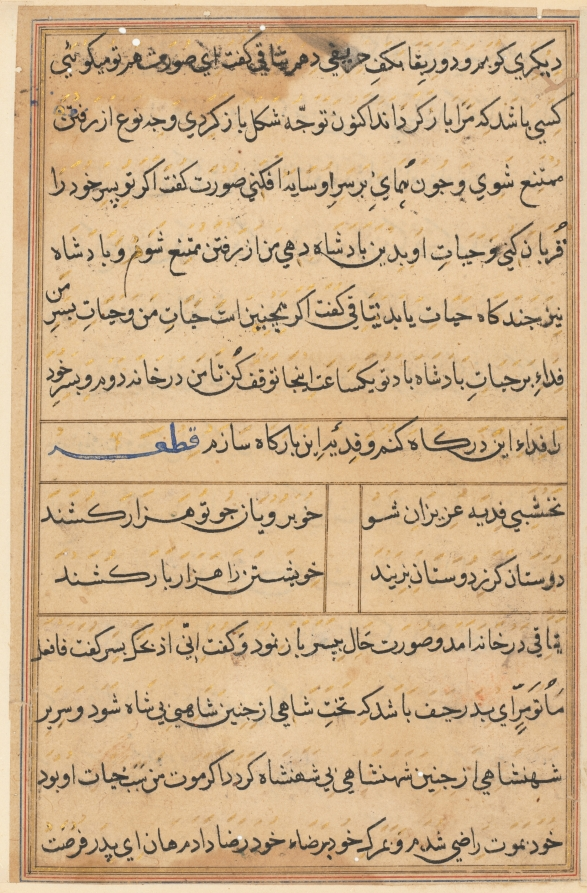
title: Page from Tales of a Parrot (Tuti-nama): text page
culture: Mughal India, court of Akbar (reigned 1556–1605)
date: c. 1560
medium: gum tempera, ink, and gold on paper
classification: Painting